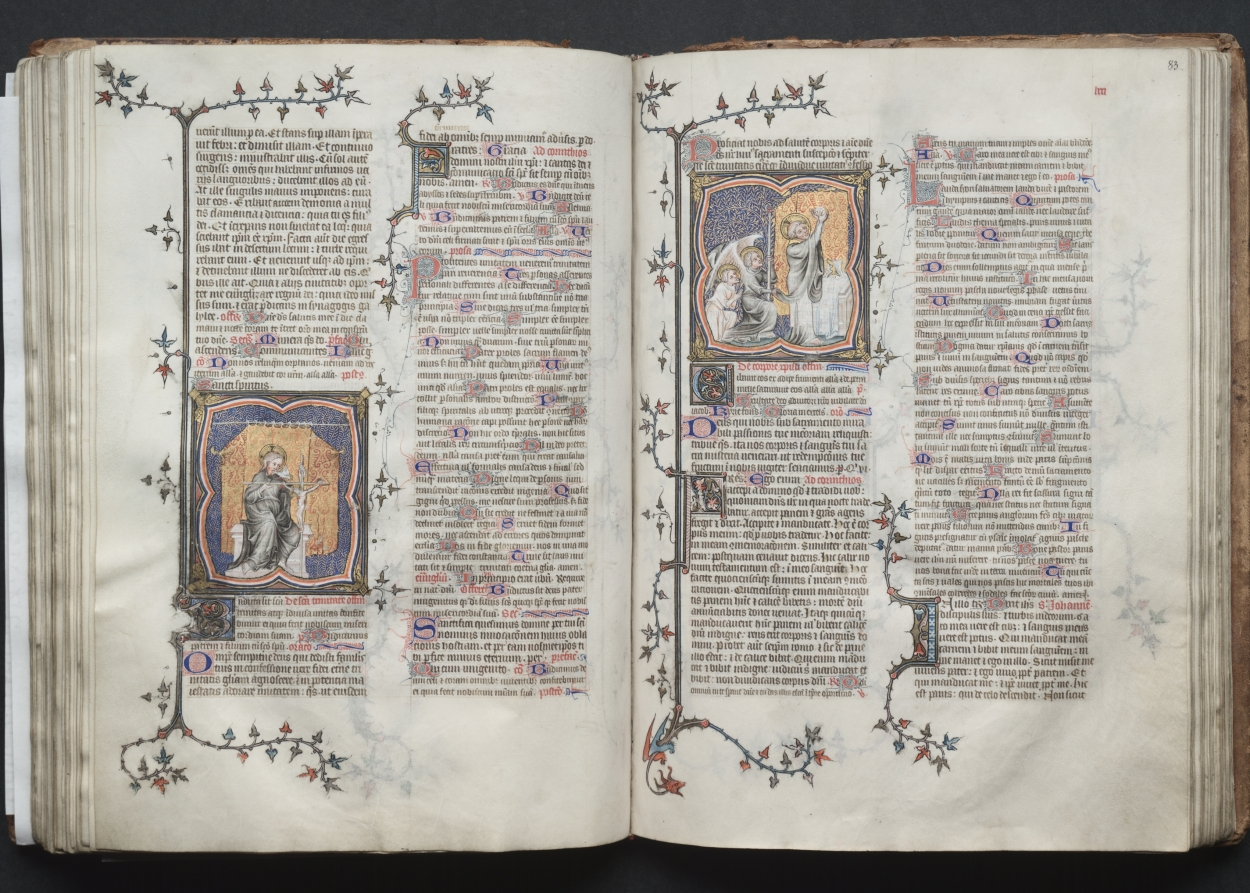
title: The Gotha Missal: Fol. 83r, Corpus Domini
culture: France, Paris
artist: Master of the Boqueteaux (French)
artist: and Workshop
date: c. 1375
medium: ink, tempera, and gold on vellum; blind-tooled leather binding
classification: Bound Volume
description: The style and quality of this manuscript's decoration is typical of deluxe Parisian books made for aristocratic or royal patrons. Most of the book's decoration appears to be the work of the Master of the Boqueteaux, an artist active at the court of King Charles V (died 1380). His style was apparently shared by a number of book illuminators working in and around Paris. It is very possible that the Gotha Missal belonged to Charles V, but is not provable because the manuscript has no royal portraits and lacks a colophon. Given the book's magnificent decoration, however, it would seem that it was produced for a Valois prince, if not for the king himself. The manuscript receives its name from the German dukes of Gotha, its later owners.